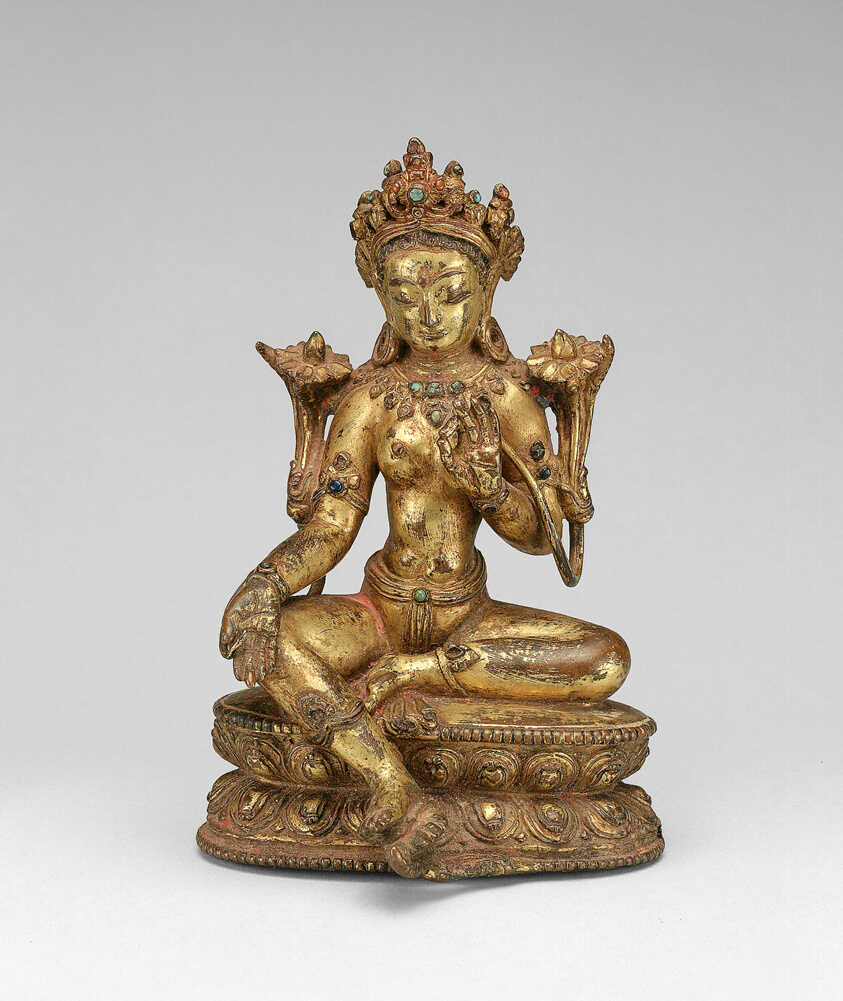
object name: Sculpture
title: Goddess Green Tara Seated with Hand in Gesture of Gift Giving (Varadamudra)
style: Himalayan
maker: Tibet; Southern Tibet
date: 14th century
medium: Gilt bronze with red pigment and gemstones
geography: Southern Tibet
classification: bronze; metal; sculpture; asian art